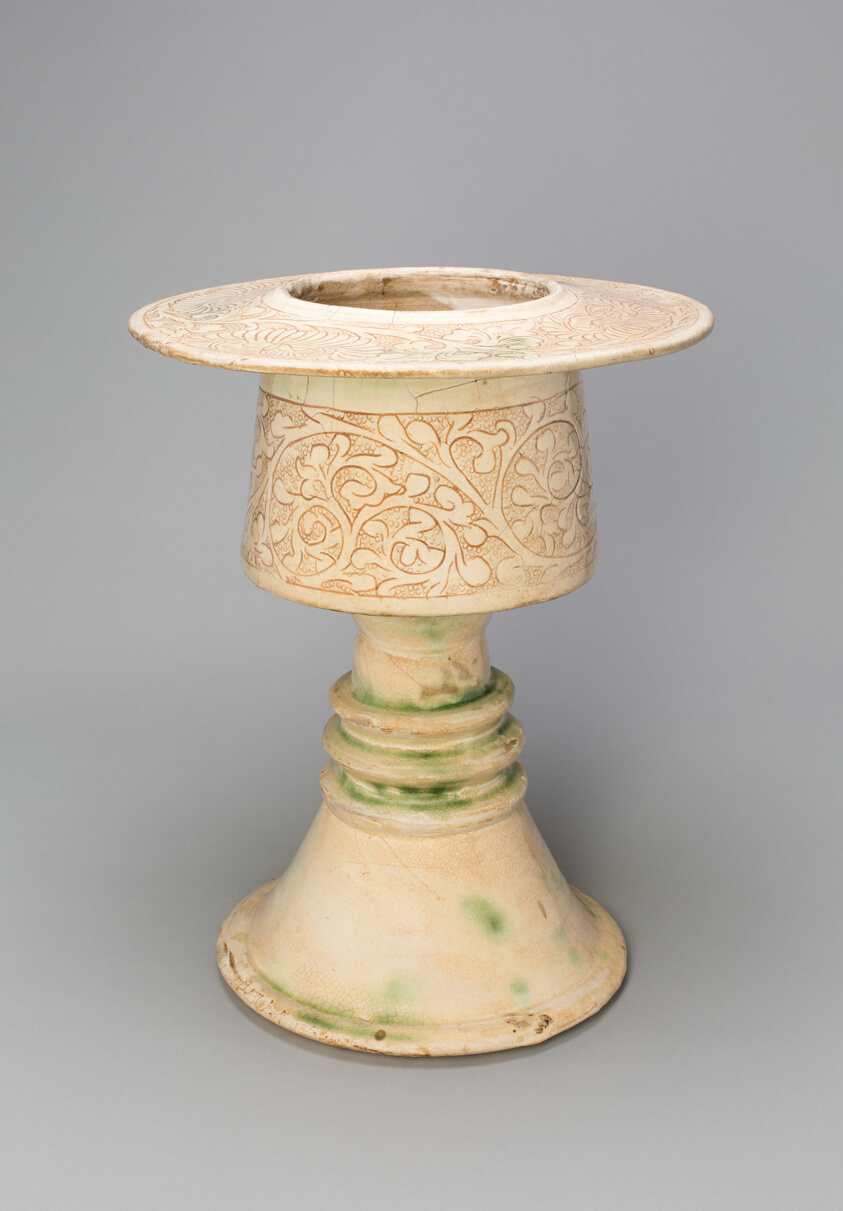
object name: Vessel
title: Incense Burner with Chrysanthemum and Knobbed Scrolls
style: Chinese (culture or style)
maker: China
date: Northern Song dynasty (960–1127), 11th century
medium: Cizhou ware; stoneware, slip-coated with incised decoration on ground of impressed rings (fish roe)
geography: China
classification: stoneware; asian art; ceramics; vessel